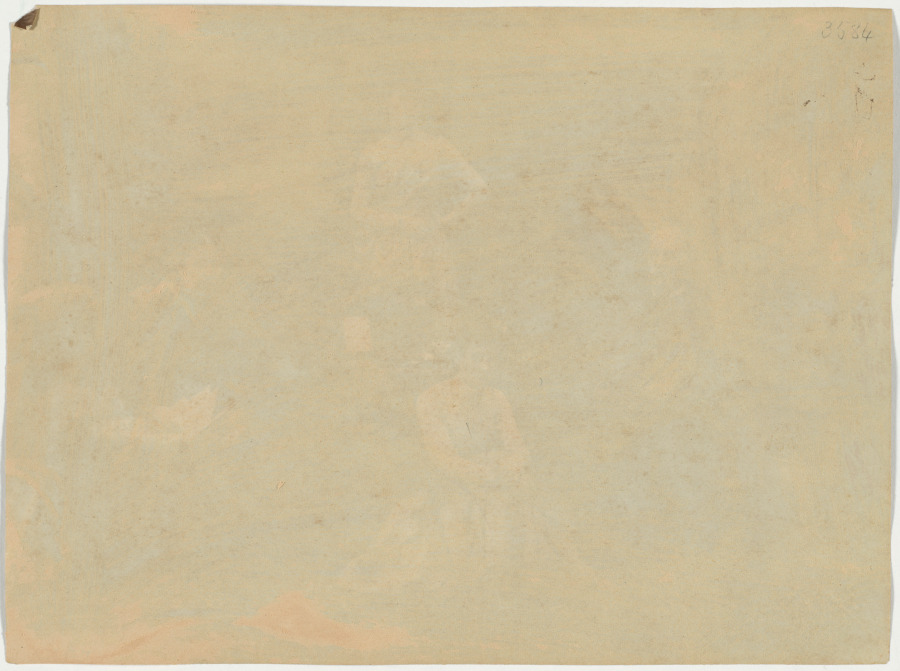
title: Sir Auckland Colvin and Family, Shimla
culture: India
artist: Raja Deen Dayal (Indian, 1844–1905)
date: 1887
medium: albumen print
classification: Photograph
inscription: Written in pencil on verso: “3584”; Imprinted in white in negative: “3584”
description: Deen Dayal’s large glass plate negatives and view camera required daylight to capture people without a blur, so his large group portraits are usually set before the sitters’ homes in their gardens. The equipment also dictated that scenes be carefully posed, not candid, shots. Sir Auckland Colvin (1838–1908) and his daughters were photographed in 1887, the year he became lieutenant governor of North-Western Provinces, a position his father had once held. The sitters are arranged so they orbit two framed photographs displayed on a table, presumably depictions of Colvin’s deceased wife and son. Thanks to photography, the entire Colvin family was reunited.